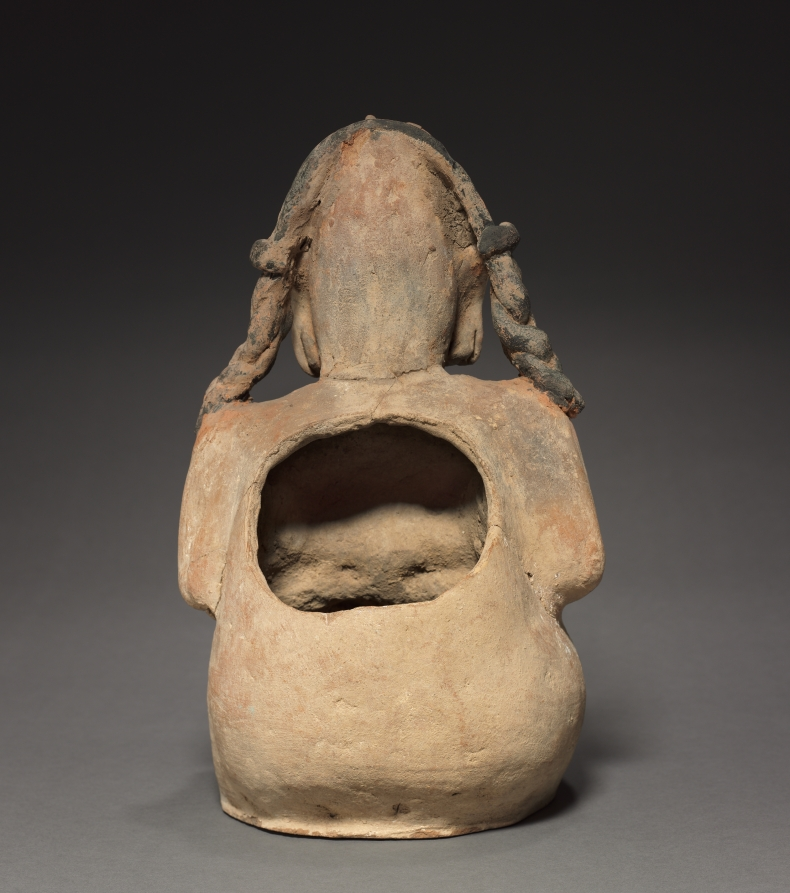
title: Elderly Figure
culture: Mexico, Campeche, Veracruz Monumental Sculpture Type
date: 600–900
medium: molded and modeled pottery with gray, tan and black paint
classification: Sculpture